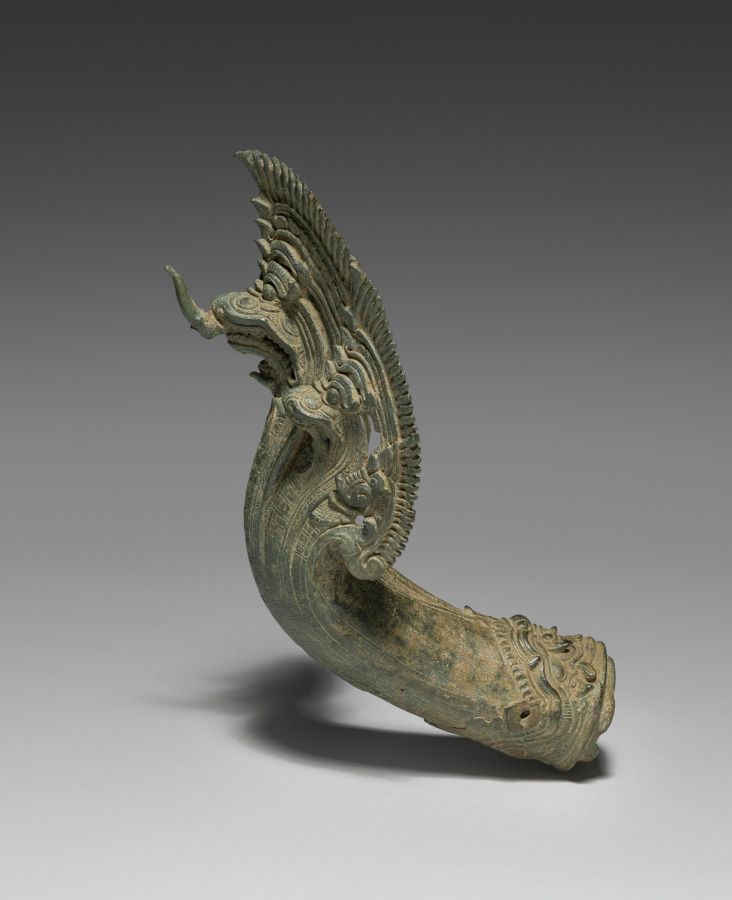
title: Naga Finial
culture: Cambodia, Angkor Wat period, 1100s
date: 1100s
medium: bronze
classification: Metalwork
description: When members of the royal family or priesthood traveled in a public festival procession or to a temple to make offerings or participate in a ceremony, they would be carried in a palanquin, or a covered litter. Portable objects of veneration, such as bronze images or a sacred fire, were also carried on palanquins. The palanquins had wooden poles, hanging seats or raised platforms, and bronze fittings cast in intricate forms and gilt, lending the palanquins a sumptuous quality. The royal palanquins were typically fitted with multiheaded, serpent-shaped finials at the ends of the poles and corners of the elevated platforms. Naga means serpent in Sanskrit, a language from India selectively appropriated by the Khmer in Cambodia. In their own indigenous mythology, the Khmer people trace their descent from a naga princess and a prince from the island of Java who journeyed to Cambodia. The naga remains a potent emblem for the Khmer nation to this day; it is ubiquitous on Cambodian monuments.